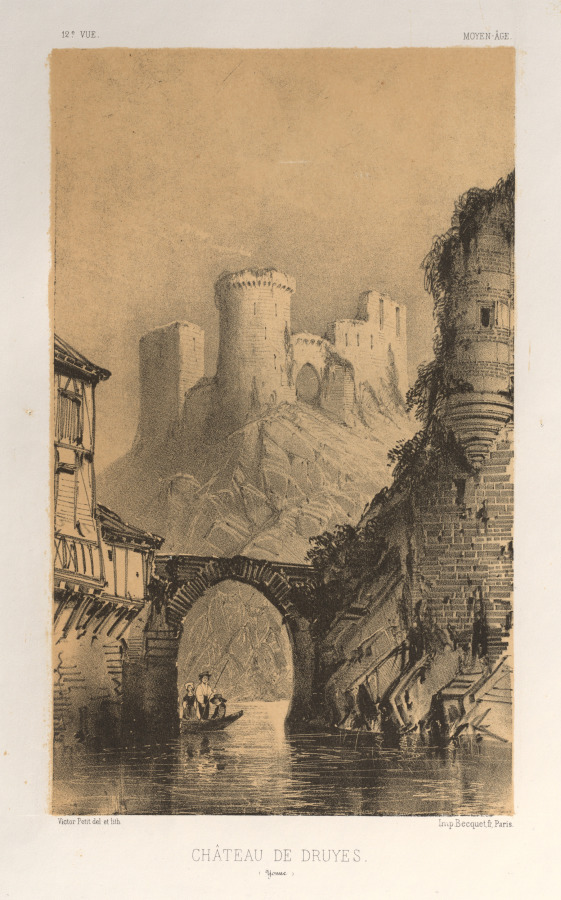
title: Architecture Pittoresque ou Monuments des xveme. Et xvieme. Siecles: Chateaux De France des XV et XVI Siecles: Pl. 12, Chateau De Druyes (Yonne)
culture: France, 19th century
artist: Victor Petit (French, 1817–1874)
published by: Charles Boivin (publisher and editor); Lith de Godard a Paris (printer)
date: 1860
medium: lithograph with tint stone, from portfolio of 100 lithographs with tint stone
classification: Print